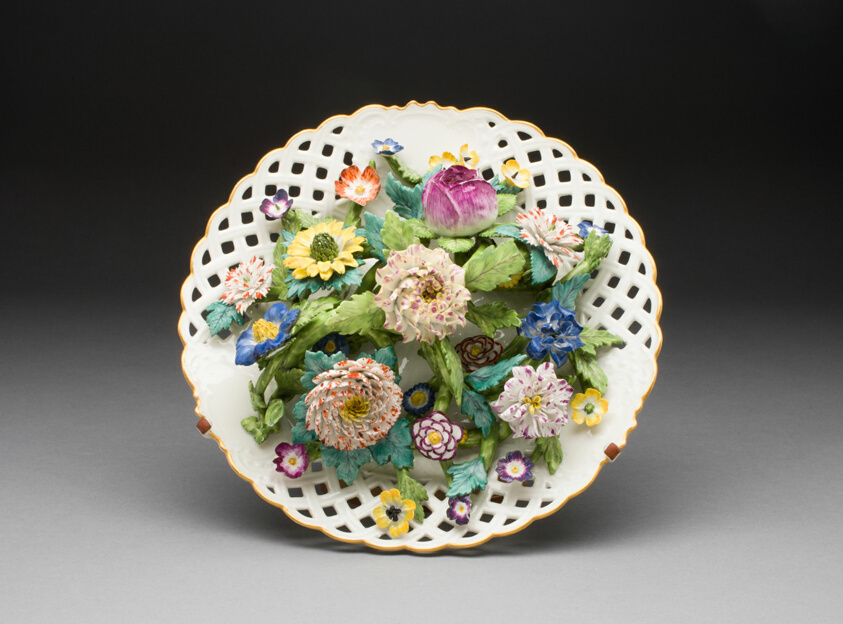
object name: Ceramics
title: Plate with Applied Flowers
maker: Meissen Porcelain Manufactory (German, founded 1710)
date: 1763/74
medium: Hard-paste porcelain, polychrome enamels, and gilding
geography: Meissen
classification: plate (general, dish); tableware; dish (vessel); porcelain; european decorative arts; ceramics